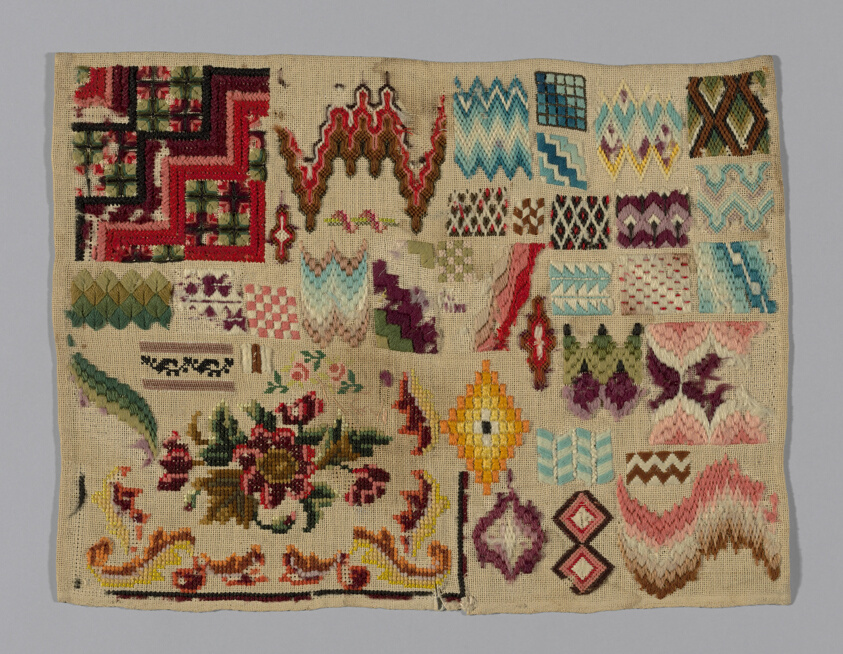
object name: Textile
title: Sampler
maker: Germany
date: 19th century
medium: Linen; embroidered with wool and silk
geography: Germany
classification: textile; needlework (visual works); sampler